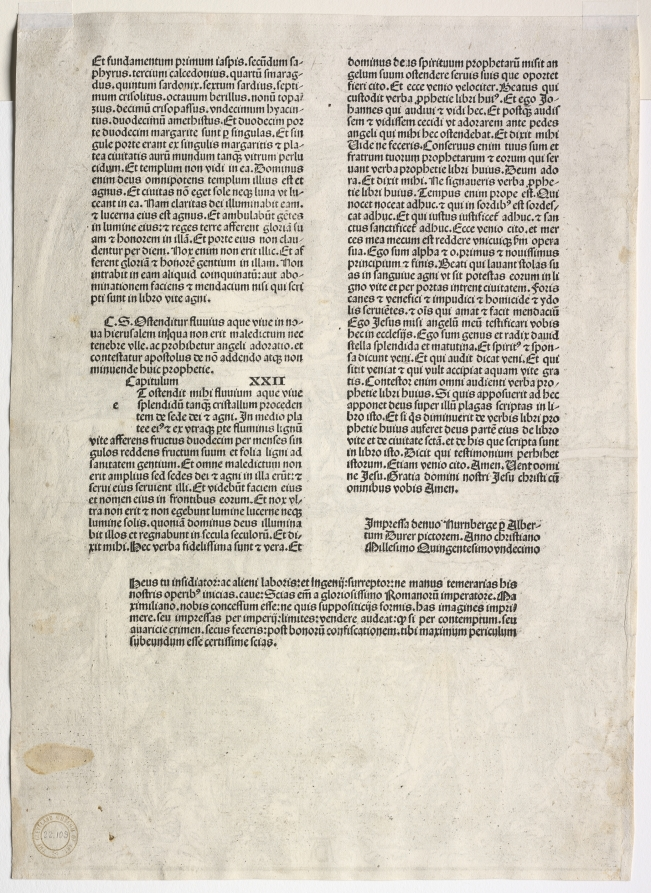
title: Revelation of St. John: The Woman of Babylon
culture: Germany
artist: Albrecht Dürer (German, 1471–1528)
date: 1511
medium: woodcut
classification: Print